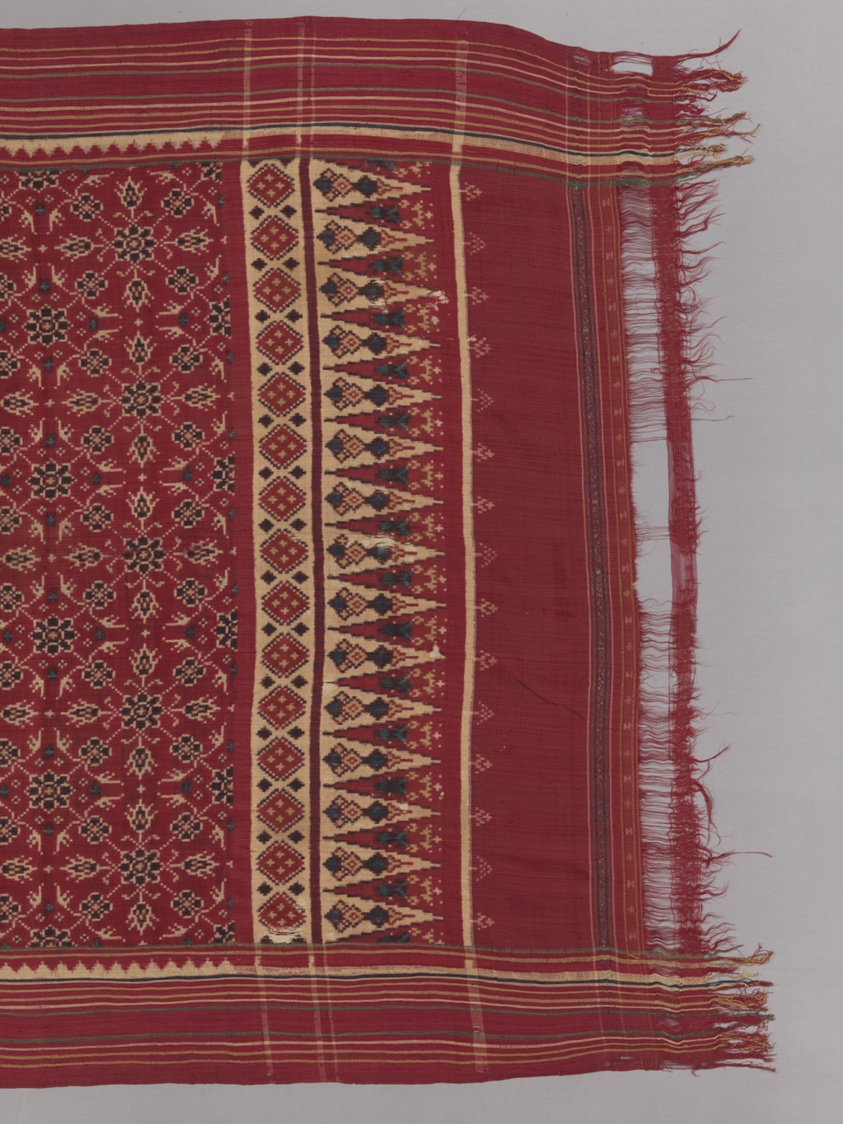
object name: Textile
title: Patolu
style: indonesian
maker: Gujarat, India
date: 18th/19th century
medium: Silk and silver-metal-strip-wrapped silk, stripes of warp and weft resist dyed (double ikat), plain weave, stripes of weft resist dyed (weft ikat), plain weave , bands of plain weave and bands of open warps; plied and knotted main warp fringe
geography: India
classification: textile; weaving - printed